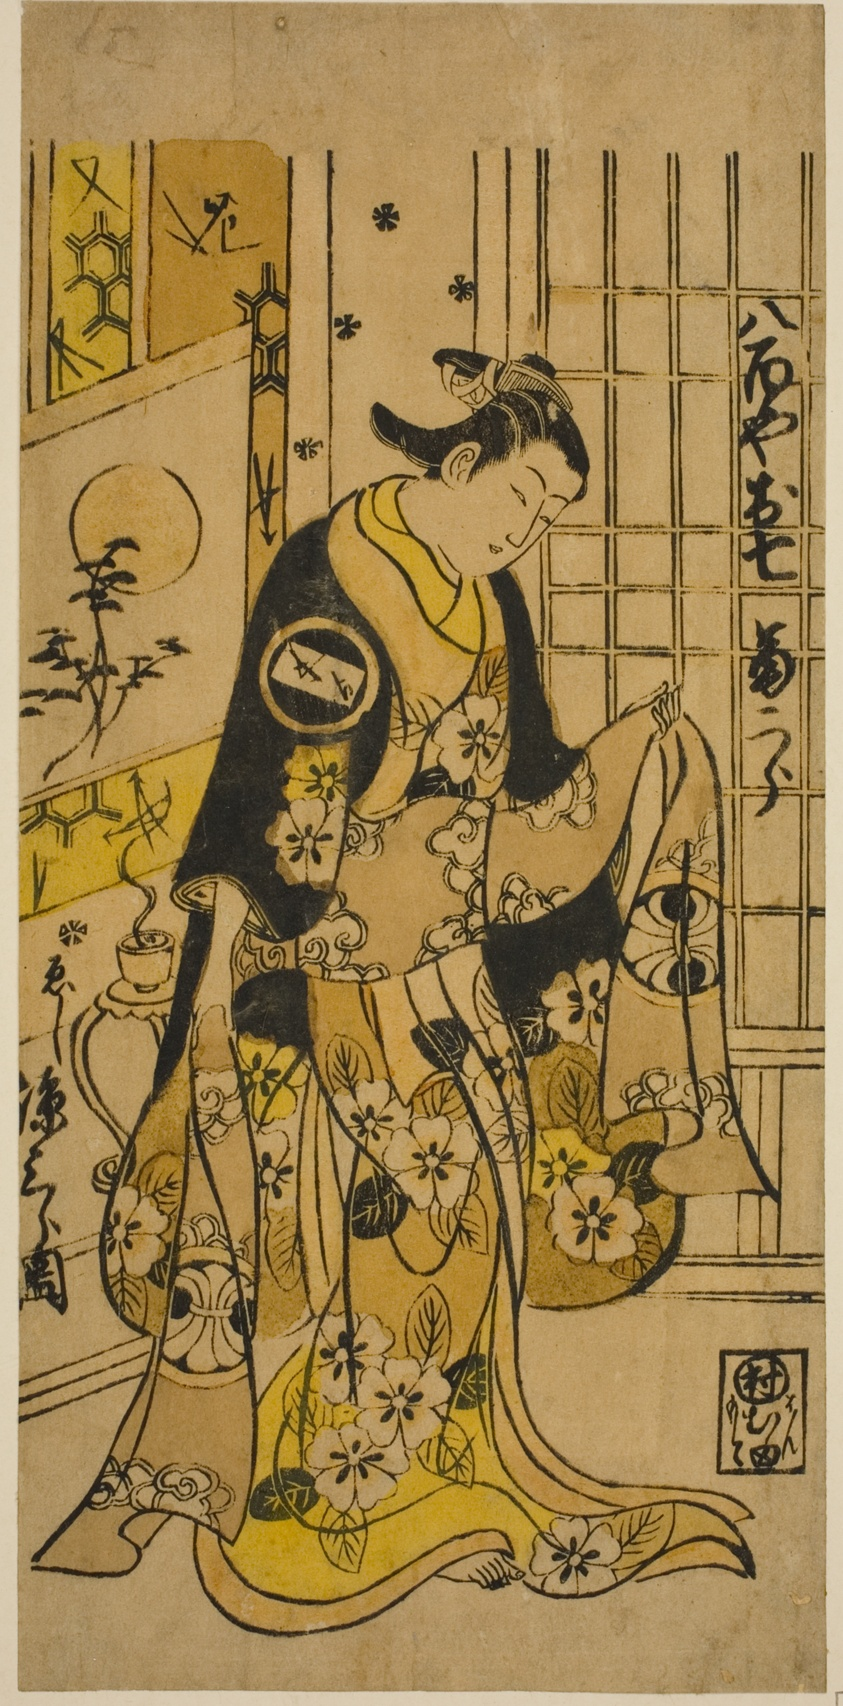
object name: Print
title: The Actor Segawa Kikujiro I as Oshichi in the play "Shochikubai Kongen Soga," performed at the Ichimura Theater in the third month, 1732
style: Japanese (culture or style)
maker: Nishimura Shigenobu (Japanese, active c. 1723-47)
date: 1732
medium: Hand-colored woodblock print; hosoban, urushi-e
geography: Japan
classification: woodblock print; print; asian art